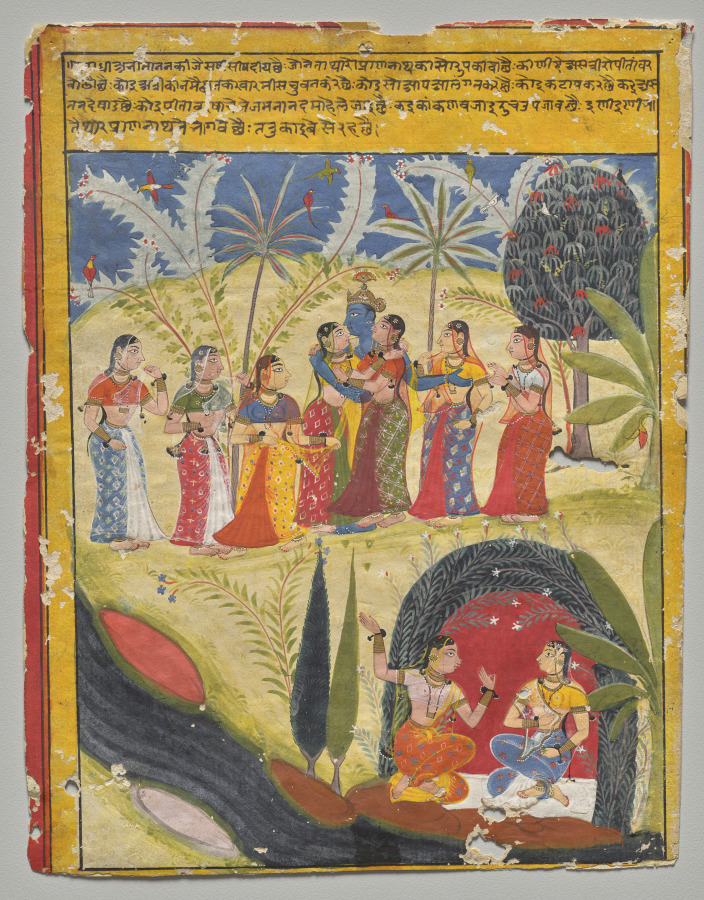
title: Krishna and Gopis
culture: Northwestern India, Rajasthan, Rajput Kingdom of Mewar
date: c. 1660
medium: Gum tempera, ink, and gold on paper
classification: Painting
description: While Radha waits for Krishna in her bower, he is flirting with other women of the cowherding community. Like a fickle lover, sometimes god abandons his devotee and showers blessings on others. Radha's companion comes to bring her the news of Krishna's playful, erotic activities.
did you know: The Yamuna River flows across the bottom of the page.